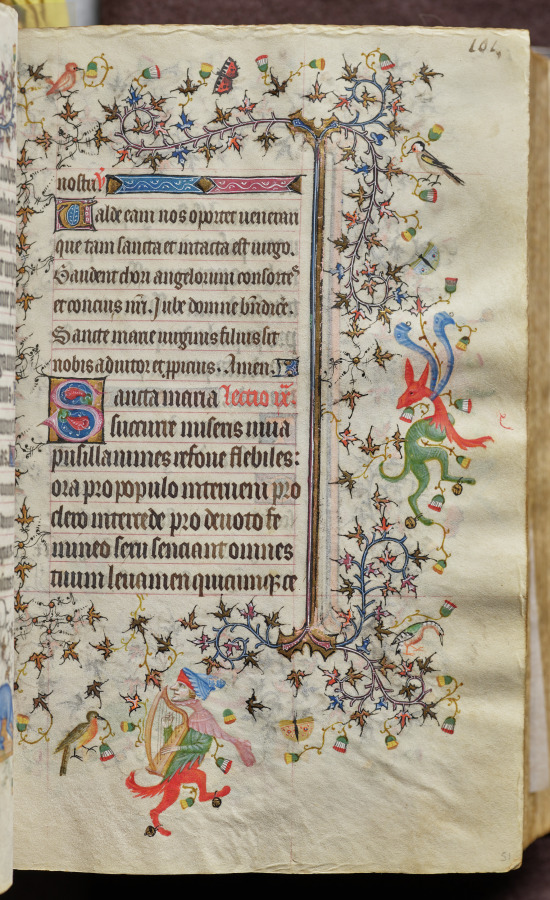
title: Hours of Charles the Noble, King of Navarre (1361-1425): fol. 51r, Text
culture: France, Paris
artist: Master of the Brussels Initials and Associates (French)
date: c. 1405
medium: ink, tempera, and gold on vellum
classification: Bound Volume